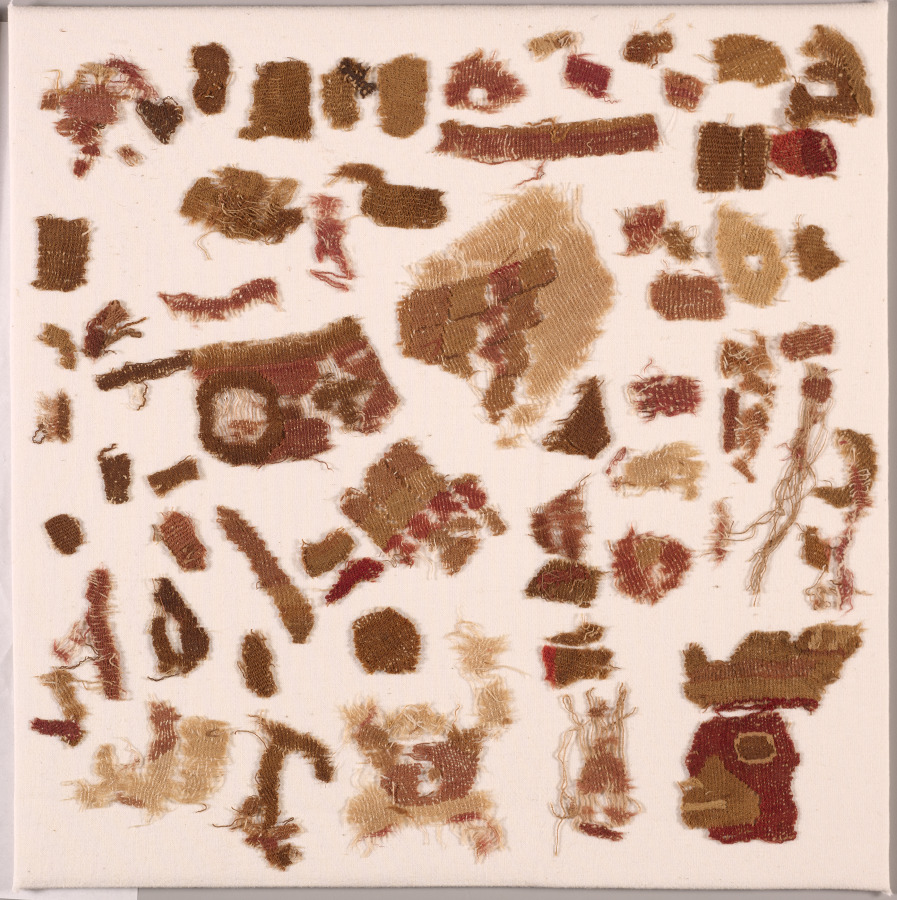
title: Textile Fragments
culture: Peru, Moche, north coast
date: c. 50–650 CE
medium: cotton and camelid fiber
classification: Textile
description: These fragments are rare survivors of catastrophic rains that destroyed much of the Moche textile legacy and may have helped to bring about the decline of Moche culture. Each depicts a serpent and a snail beneath a hovering raptorial bird—perhaps a snail kite, a type of hawk named after its favored food. The size of the motifs implies that the original textile was large; a mantle (a shawl-like garment) or a hanging are among the possibilities.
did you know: These fragments are rare survivors of floods that destroyed much of the Moche textile record.